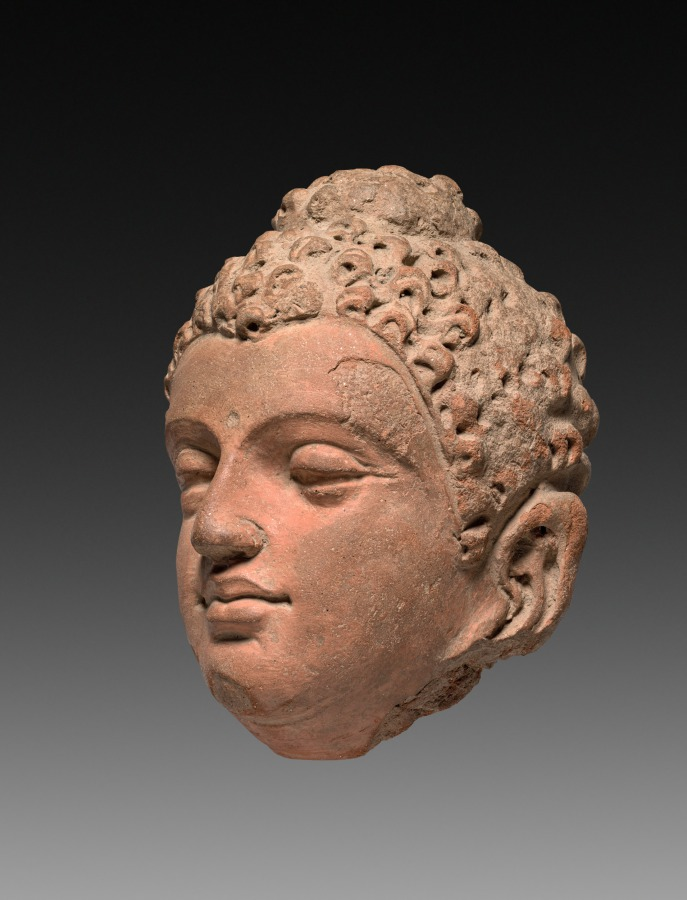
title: Head of Buddha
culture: India, Kashmir, Akhnur school, 8th century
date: 700s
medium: Clay, accidentally burned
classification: Sculpture